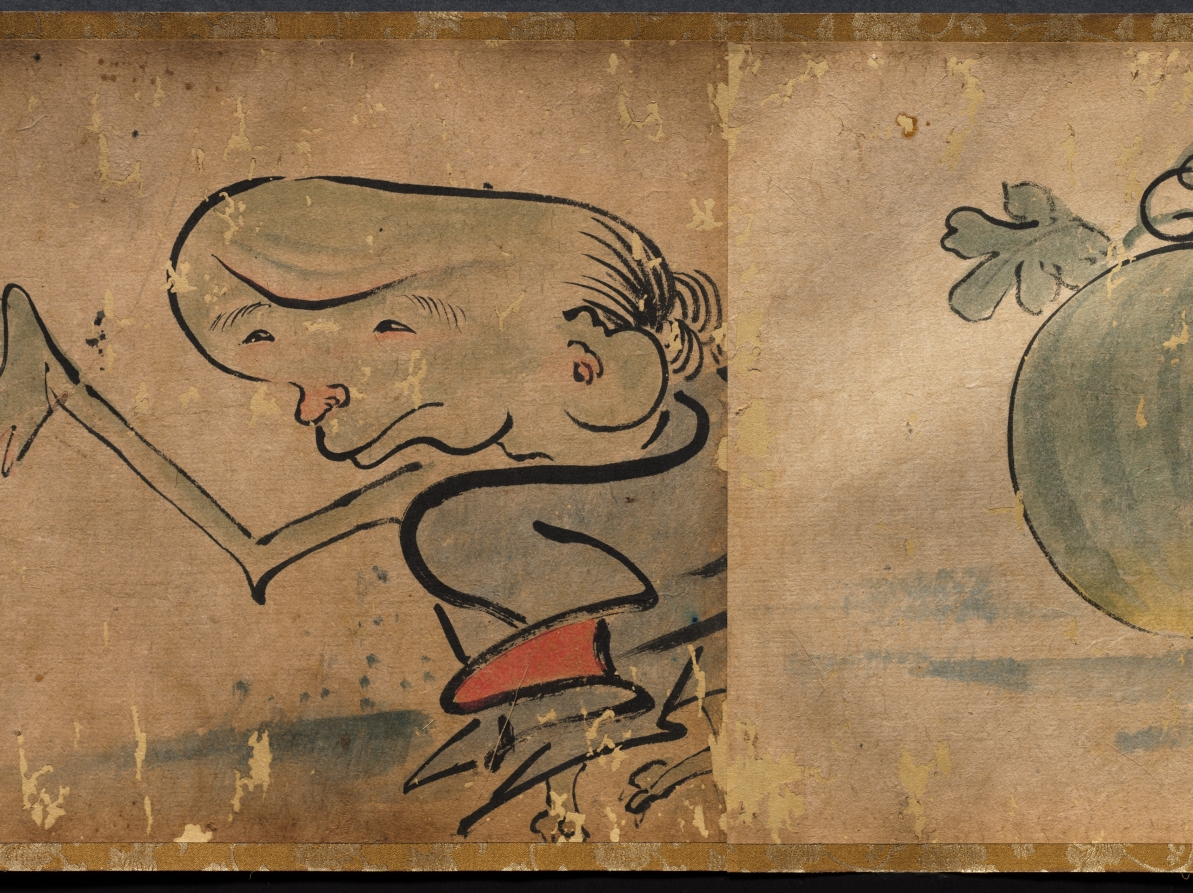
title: The Illustrated Tale of Oishi Hyōroku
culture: Japan, Edo period (1615–1868)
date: 1700s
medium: handscroll; ink and color on paper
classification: Painting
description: This incomplete handscroll illustrates part of the story of Oishi Hyoroku, a young man tasked with battling fox apparitions who were creating problems in his town. In other extant versions of the scroll, the story is set in the fall of 1624 in Kagoshima in southern Japan. Throughout the story, Hyoroku is tricked and terrified by the foxes that shift their shapes into a variety of monstrous phantoms. After repeated humiliations, he eventually captures two of the foxes. In this version, colloquial texts that function like text blurbs in comics appear throughout the scroll, but the main text is missing.